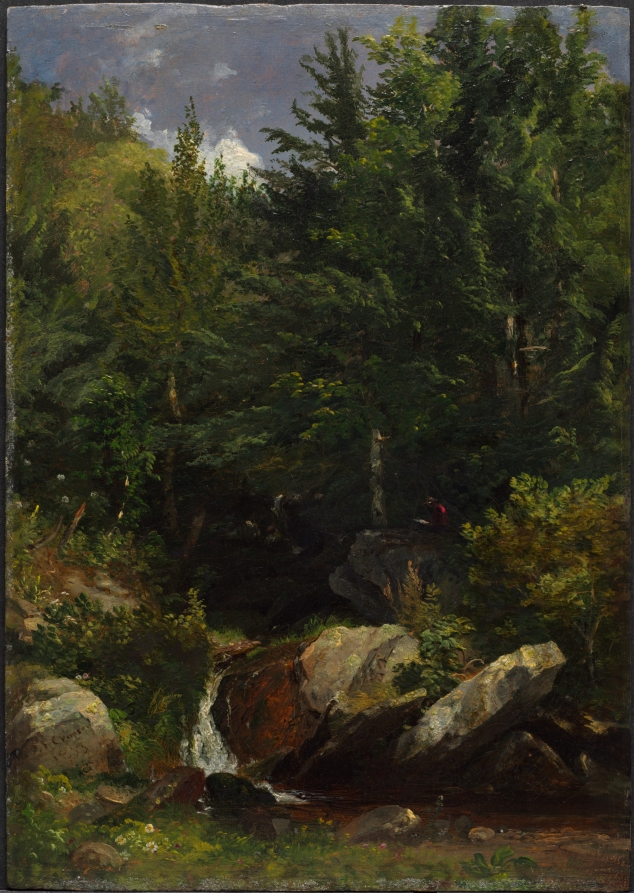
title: Trees and a Stream on a Hillside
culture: America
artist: Jasper F. Cropsey (American, 1823–1900)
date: 1853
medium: oil on board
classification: Painting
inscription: Signed lower left: "J. F. Cropsey / 1853"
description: This oil sketch was probably made on a trip through Massachusetts in the summer of 1853.